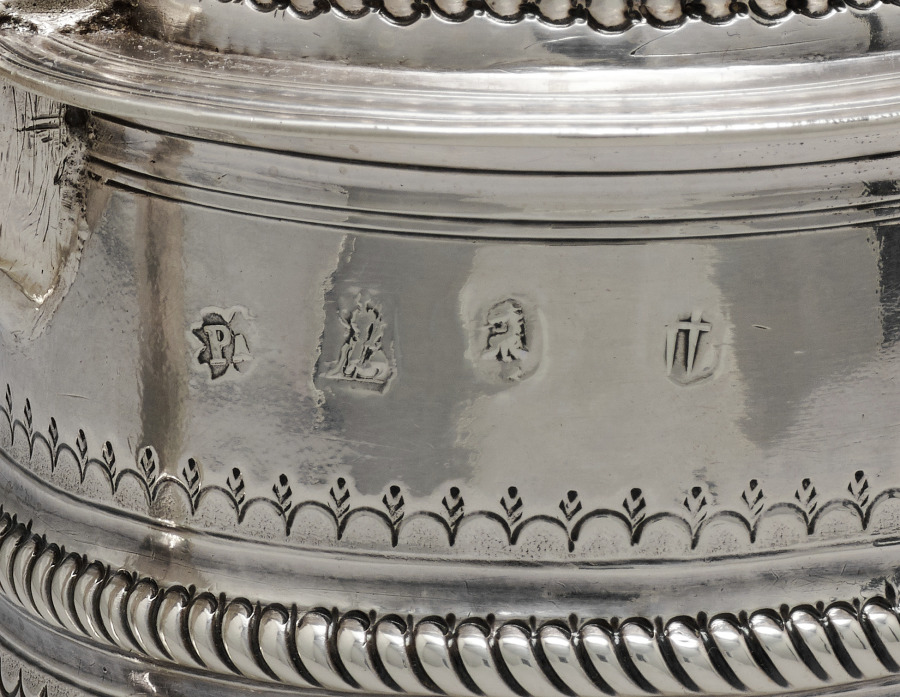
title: Tankard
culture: England, London, early 18th Century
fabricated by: Thomas I Parr (British)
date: 1701–1702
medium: silver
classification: Silver